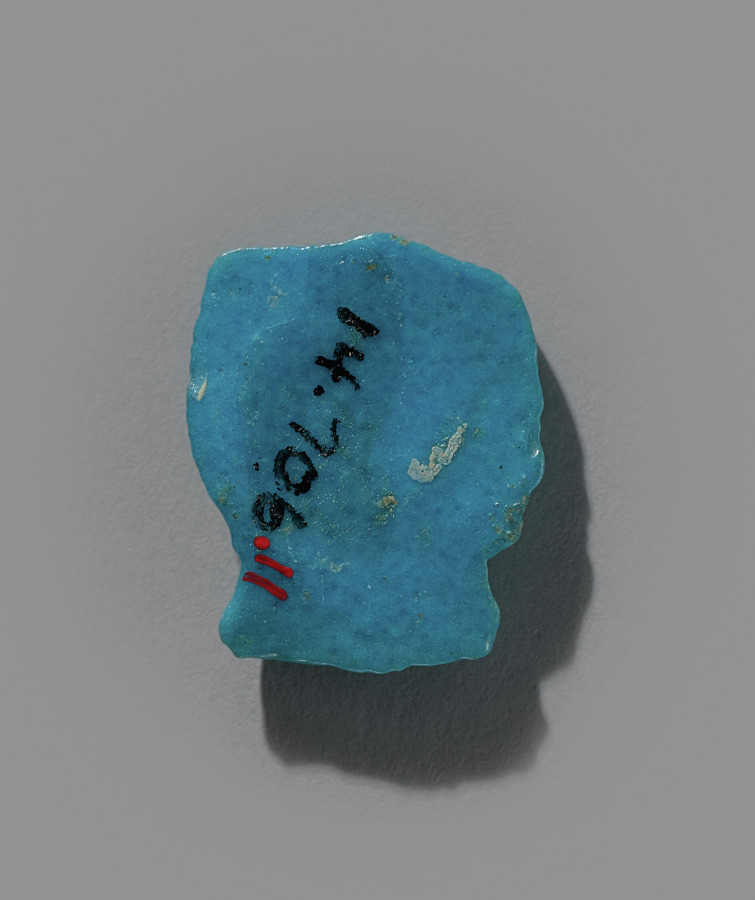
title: Food Model Amulet: Brace of Duck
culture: Egypt, New Kingdom (1540–1069 BCE), Dynasties 19–20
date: 1295–1069 BCE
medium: turquoise faience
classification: Amulets